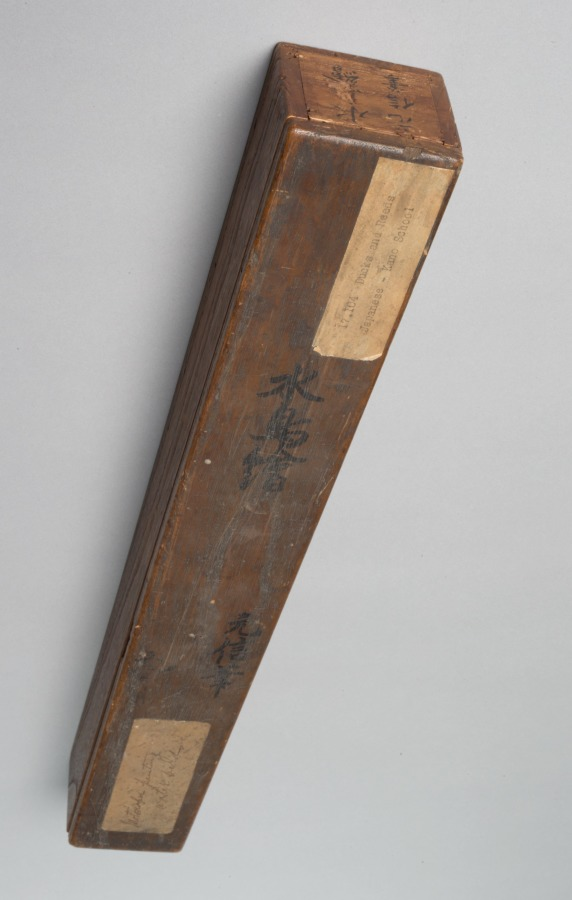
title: Ducks and Reeds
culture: Japan, Momoyama period (1573-1615) to Edo period (1615-1858)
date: early 1600s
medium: hanging scroll; ink on paper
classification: Painting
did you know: This painting was produced by a member of the Kano school.